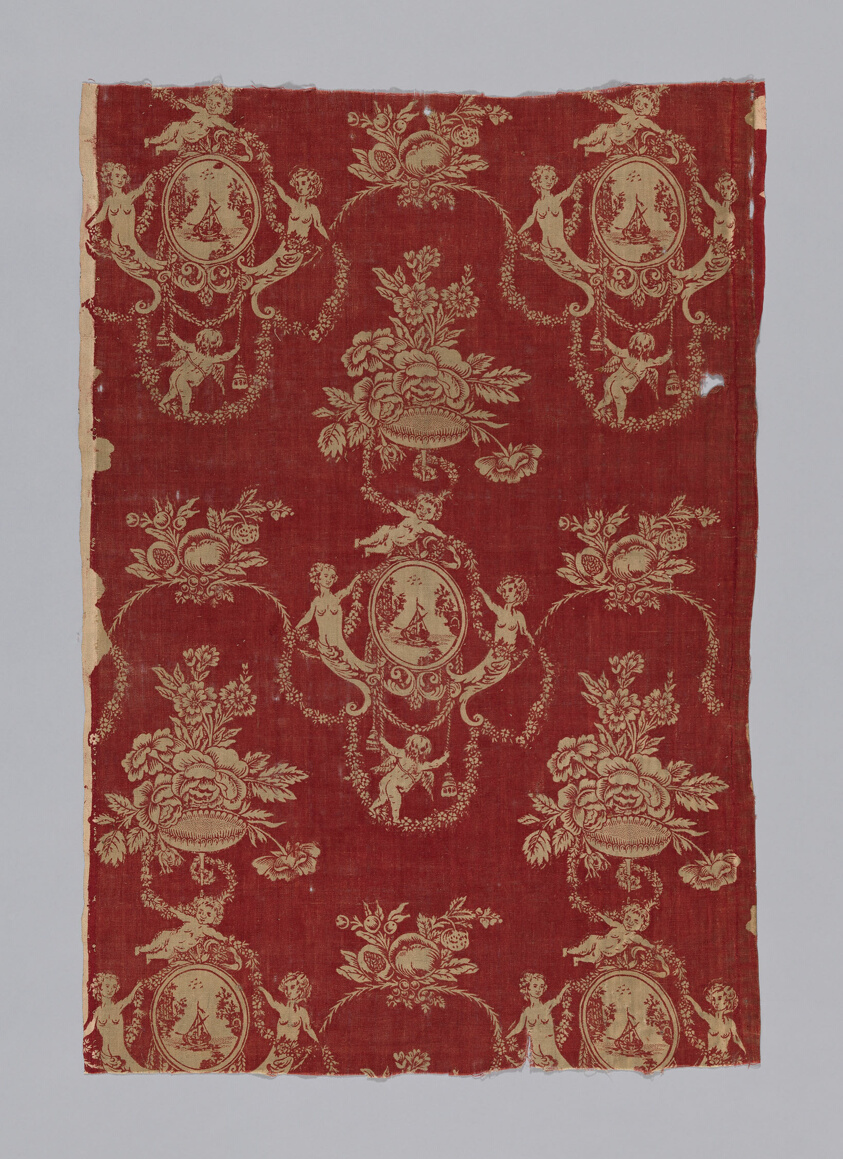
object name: Textile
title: Fragment (Furnishing Fabric)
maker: France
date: 18th century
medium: Cotton, plain weave; block printed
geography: France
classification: textile; weaving - printed; furnishing textile